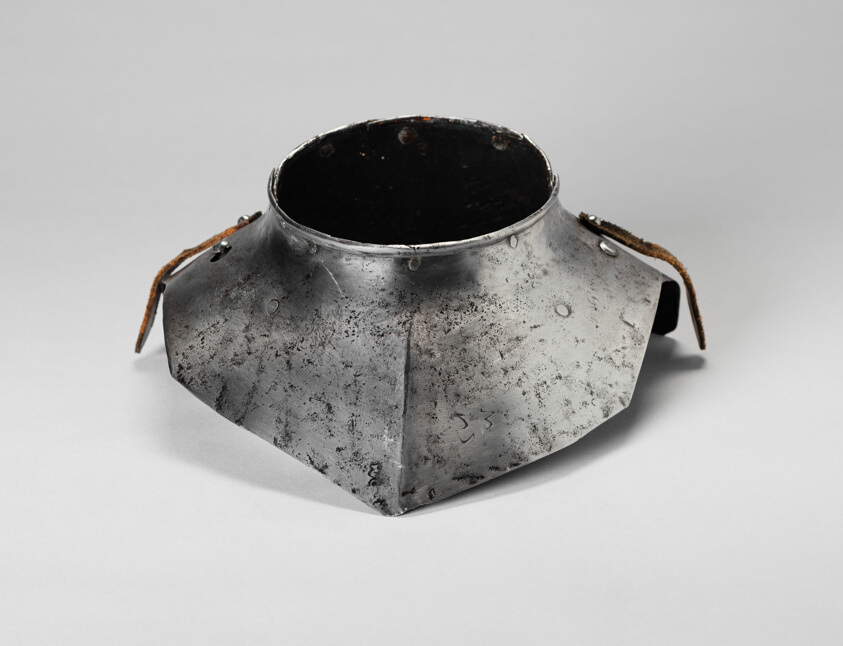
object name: Armor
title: Gorget for Composite Boy's Armor for Foot Tournament at the Barriers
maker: South German; Augsburg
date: c. 1600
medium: Steel, brass, and leather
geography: Augsburg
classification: suit-element; armor; arms and armor